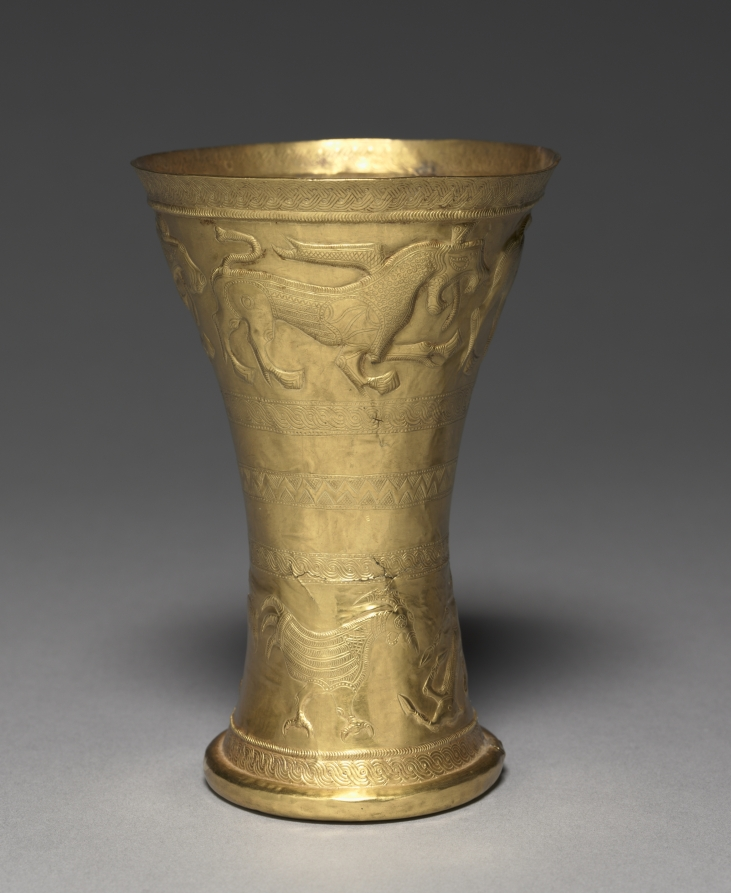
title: Beaker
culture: Iran, Marlik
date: 1100–1000 BCE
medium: gold, low relief repoussé and incised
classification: Metalwork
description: The nomadic gold- and silversmiths of Marlik and Amlash were the first masters of precious metalwork in Iran. Their successors were the bronze workers of Luristan and the silversmiths of the Achaemenian and Sasanian empires, whose masterpieces are shown elsewhere in this gallery.